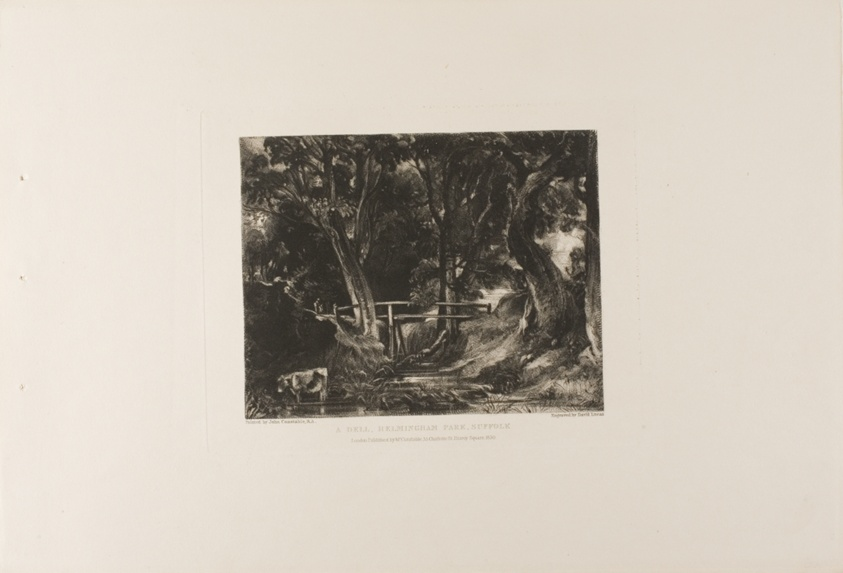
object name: Print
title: A Dell, Helmingham Park, Suffolk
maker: David Lucas (English, 1802-1881); after John Constable (English, 1776-1837)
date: 1830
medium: Mezzotint in black ink on heavy ivory wove paper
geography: England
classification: mezzotint; print; prints and drawing